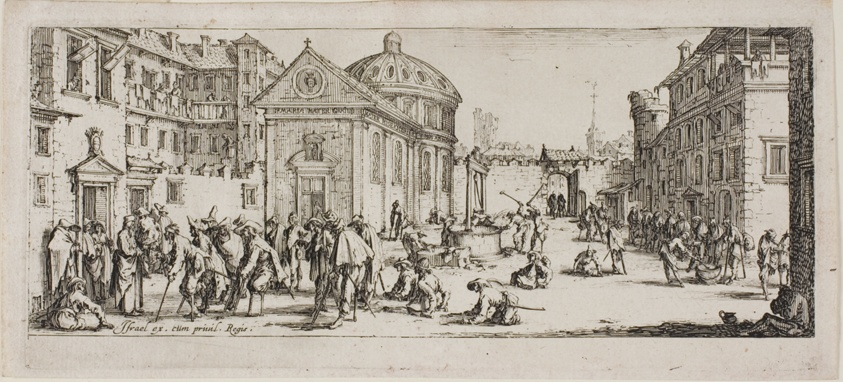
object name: Print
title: The Hospital, plate fifteen from The Miseries of War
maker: Jacques Callot (French, 1592-1635)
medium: Etching on paper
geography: France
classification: etching; print; prints and drawing